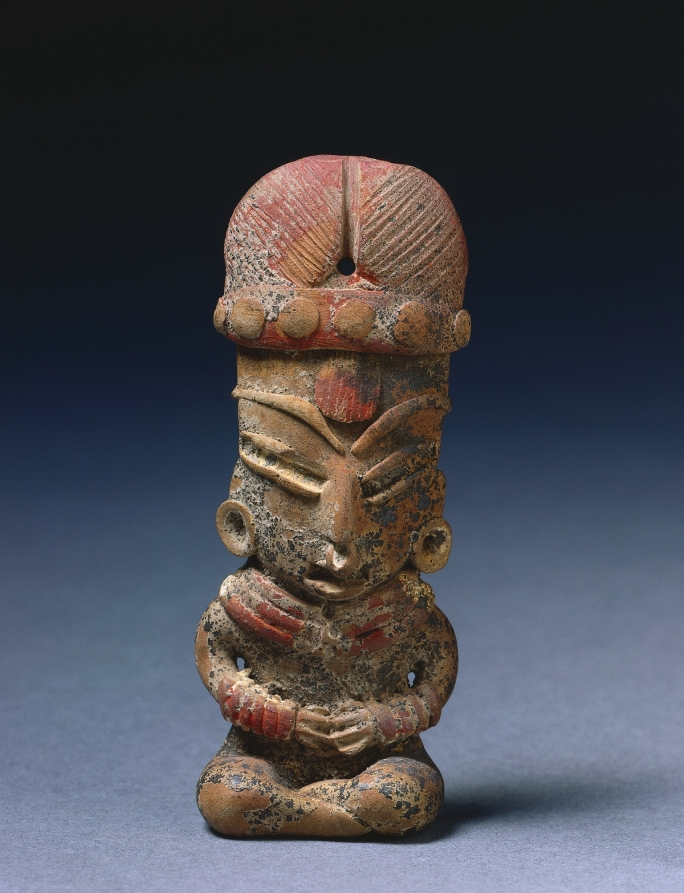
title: Seated Female Figurine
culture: Mesoamerica, Guanajuato or Michoacán, Chupícuaro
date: 600 BCE–250 CE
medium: ceramic, pigments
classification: Ceramic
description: Clay figurines, mainly nude females, were the most common art form of early villages throughout Mesoamerica. The meanings of these sweet, small, intimate works are not known, but they are found both in human burials and in household rubbish, suggesting varied uses.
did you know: Clay figurines, mainly nude females, were the most common art form of early villages throughout Mesoamerica.